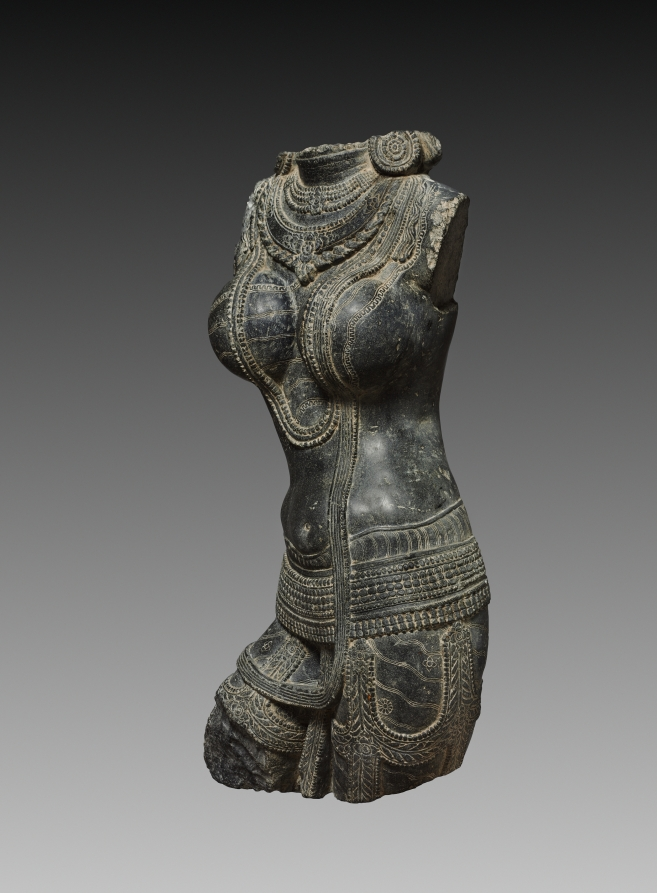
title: Female torso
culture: Northeastern India, Pala dynasty (730-1197)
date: 1000s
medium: black chlorite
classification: Sculpture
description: This life-size sculpture of a female figure was likely installed by a doorway or in an exterior niche of a Buddhist temple. Throughout the history of Indian art, voluptuous female figures have adorned Buddhist sanctuaries. Embodying the Indian ideal of female beauty, the form of the young mother with full breasts of milk personifies abundance, nourishment, and productivity—ideas that were considered auspicious and life affirming. Her copious jewels and valuable textiles also visually relate that the good karmic actions of venerating the Buddha and following his teachings will result in abundant good fortune.